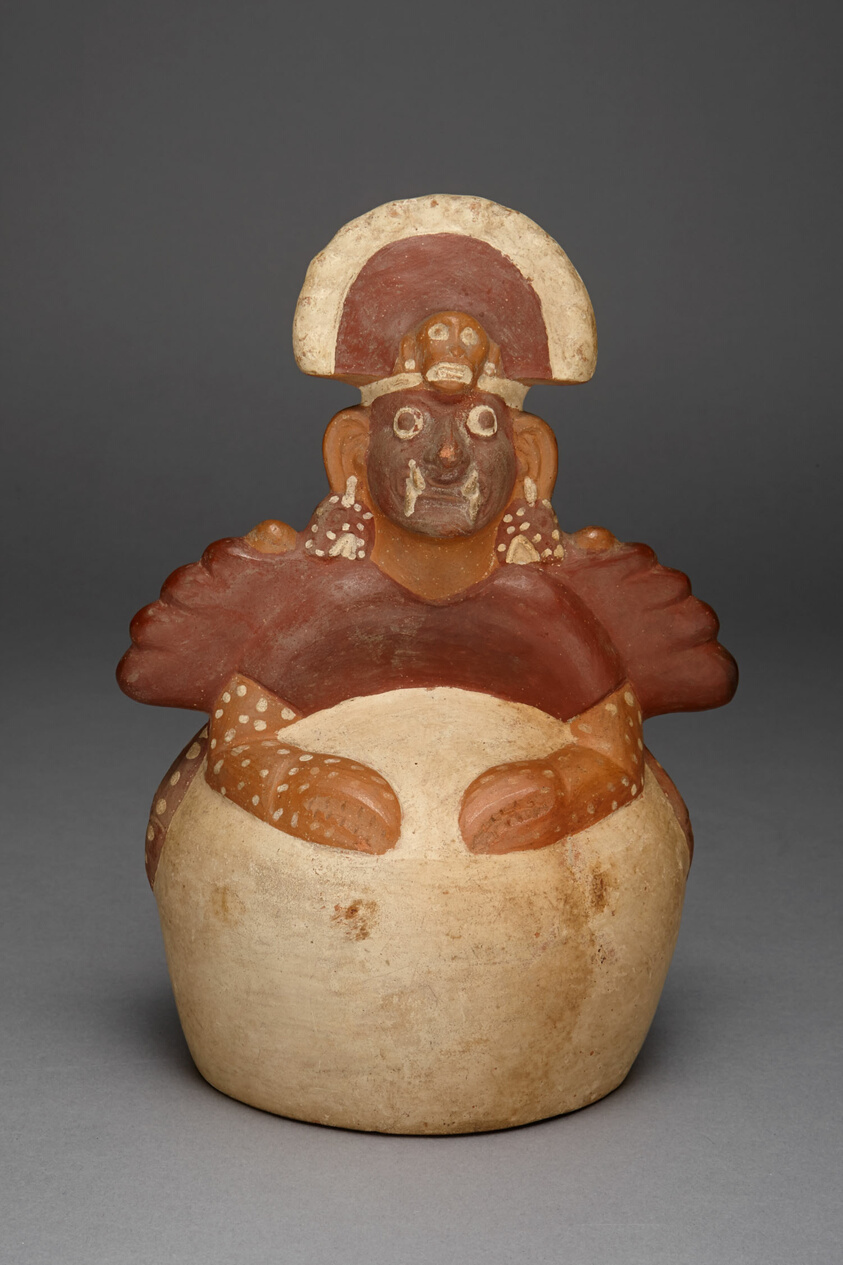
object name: Vessel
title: Vessel with a Spout Modeled in the Form of Figure, Possibly Ai-Apec, Costumed as a Crab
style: moche, mochica, early intermediate period, Pre-Columbian, americas, Arts of the Americas, andean, andes, south american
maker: Moche (North coast, Peru)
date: 100 BCE–500 CE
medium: Ceramic and pigment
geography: Moche Valley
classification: earthenware; art of the americas; ceramics; vessel